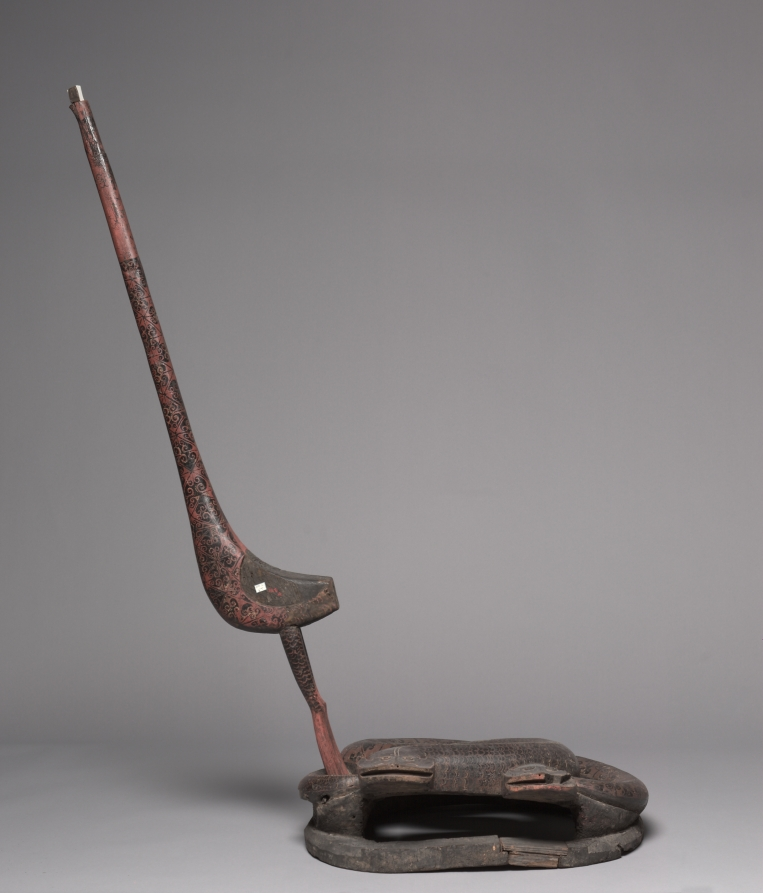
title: Cranes and Serpents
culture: China, reportedly from Hunan province, Changsha, Warring States period (475–221 BCE), State of Chu (c. 1046–223 BCE)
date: 475–221 BCE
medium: lacquered wood with polychromy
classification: Sculpture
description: A different style of ritual art developed in the state of Chu in South China. In addition to bronze vessels, lacquered wood artifacts expanded the repertory of ritual implements. This extraordinary sculpture was probably a drum stand for supporting a suspended drum in ritual ceremonies. It is unique among other excavated drum stands of the Chu, which typically show two birds standing on tigers. The theme of the bird stepping on the serpent was common in the Chu visual culture. Yet the slender proportions and seemingly flimsy structure of this particular set raise the question of whether it was utilitarian or mostly served symbolic functions in the tomb. The birds' and serpents' bodies have designs painted in red lacquer and yellow pigment against the black lacquer. Scientific analyses confirm the additional use of a blue or green pigment that has been discolored over time.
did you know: The cranes' long necks allowed a lightweight drum to be suspended from strings through the beaks, while the densely intertwined snakes provided a weighty base to stabilize the object during musical performances.